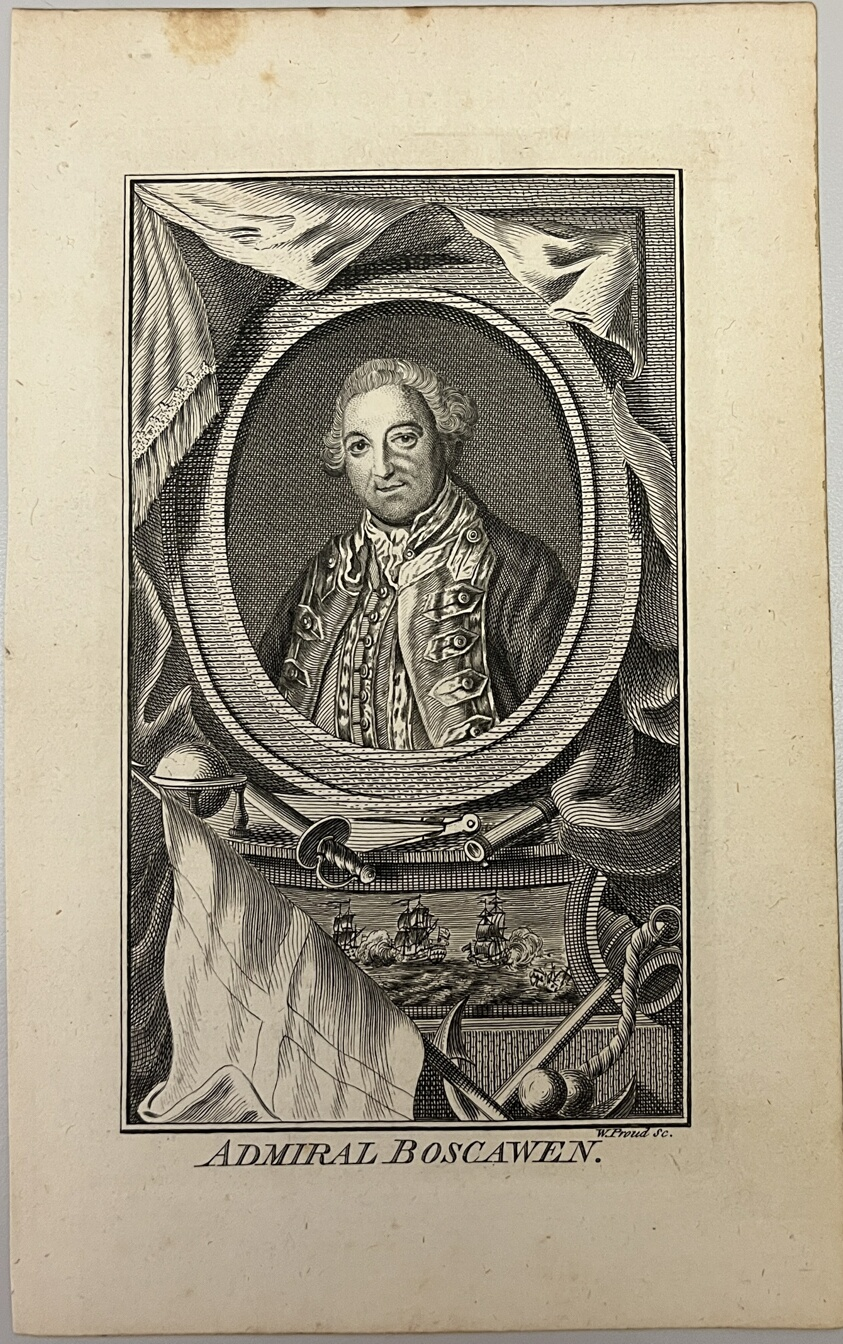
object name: Print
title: Admiral Boscawen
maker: W. Proud (British, mid 18th century)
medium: Etching and engraving on paper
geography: England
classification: reproduction; print; prints and drawing